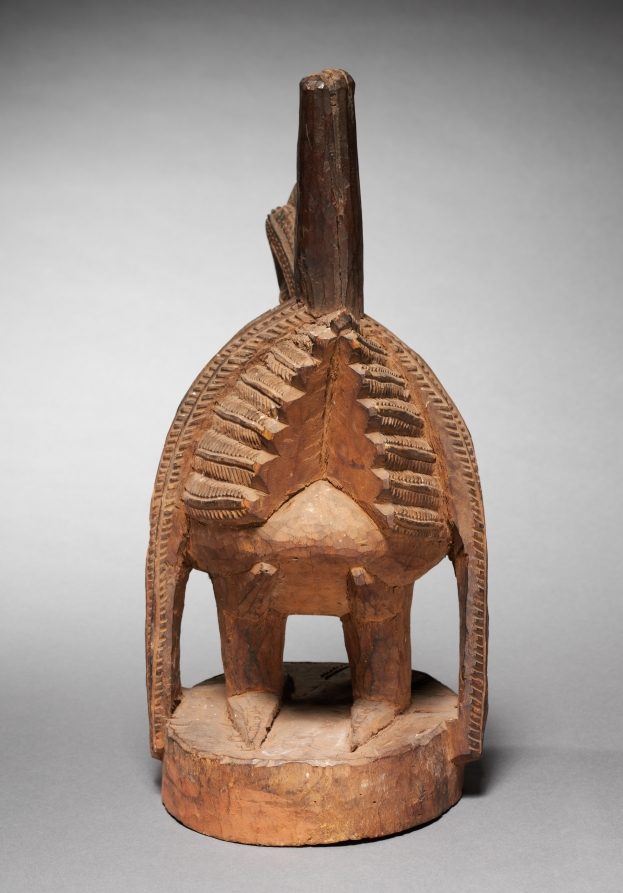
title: Hen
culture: Nigeria, Benin Kingdom, Ẹdo peoples, member(s) of the Igbesanmwan (wood and ivory carvers) guild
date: 1900s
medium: wood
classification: Sculpture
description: Materials used for ritual objects correspond with the status of their owner, or the person it was dedicated to. Men have cast brass roosters, while women have carved wooden hens like this. This egg-shaped bird is covered with patterns formed by parallel lines indicating the bird’s feathers, from fluffy tufts to sleek plumage. Realistically carved, it replicates an animal that would be sacrificed on a woman’s shrine. On an ancestral altar, it sat alongside other objects like rattle staffs. While Benin is patriarchal (men and their male sons lead), women are important; men cannot succeed spiritually or politically without them.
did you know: The interlacing pattern on the base of this sculpture can be seen in Benin Kingdom works in materials from wood to ivory to metal.